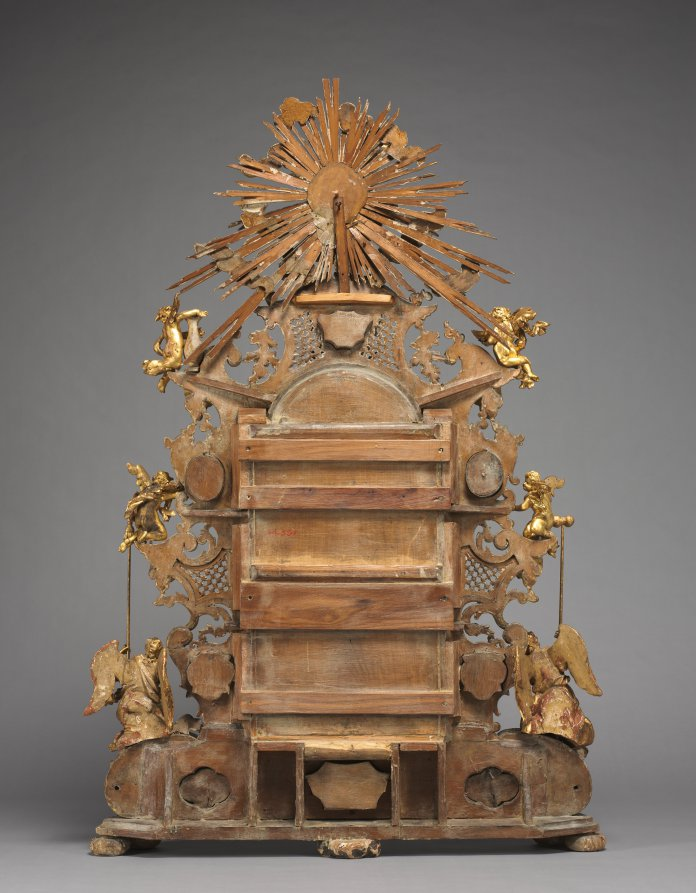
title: Altarpiece with Relics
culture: Germany, Bavaria, 18th century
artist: Joseph Matthias Götz (German, 1696–1760)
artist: and Workshop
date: c. 1735–40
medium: gilded wood, with relics in niches: gilded wood, mother-of-pearl, ebony, red silk, gold wire, seed pearls, rock crystal, pen and ink on paper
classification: Sculpture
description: Götz covers every surface in gold leaf, giving each part of the object equal importance, rather than simply framing a central picture. In this distinctively Central European approach, figural narrative is subordinate to the overall ensemble. Götz designed this object to rest on top of an altar, probably in front of a larger painted or sculpted decorative scheme. The work contains relics seen through the small windows on the perimeter. These small remains of holy figures demonstrate the persistence of a medieval Catholic tradition well into the 1700s.